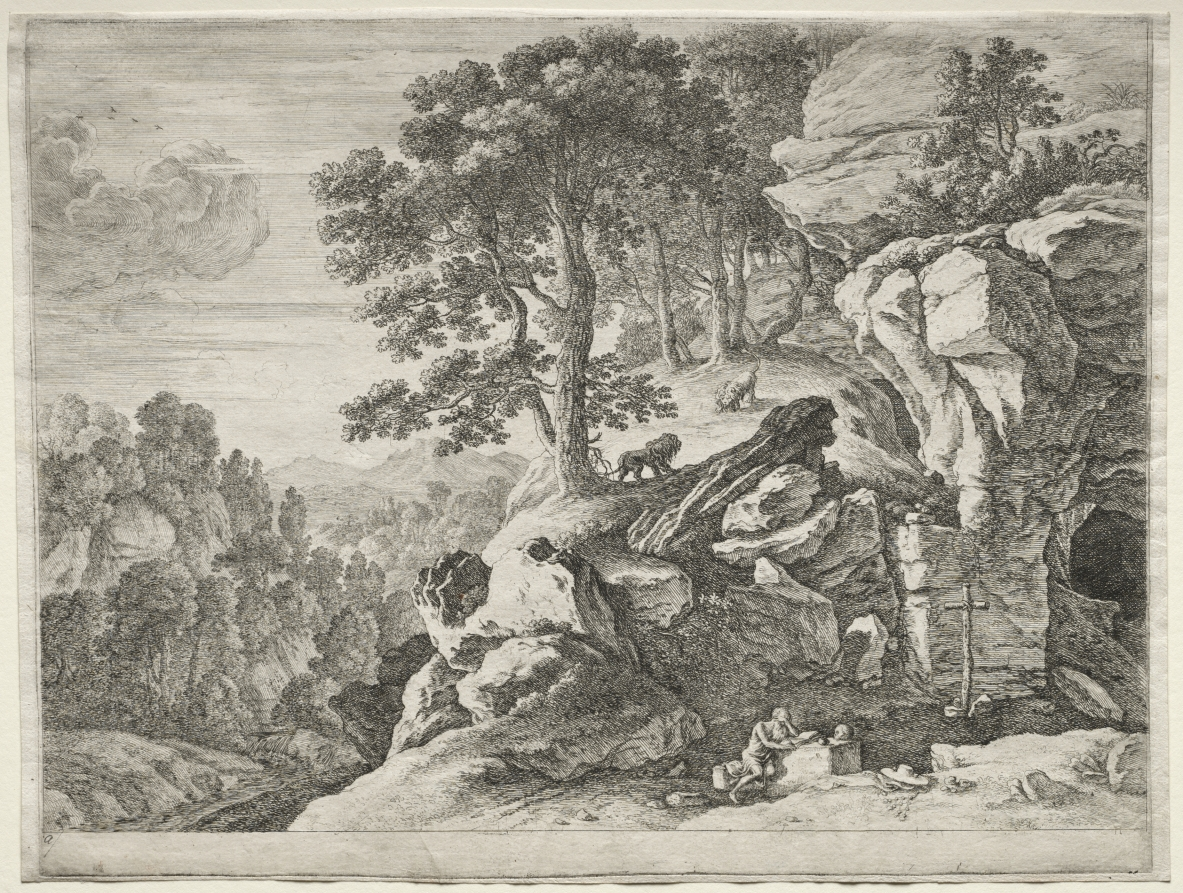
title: The Penitents: St. Jerome in the Desert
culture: Netherlands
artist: Herman van Swanevelt (Dutch, c. 1600–1655)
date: 1620–55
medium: etching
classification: Print